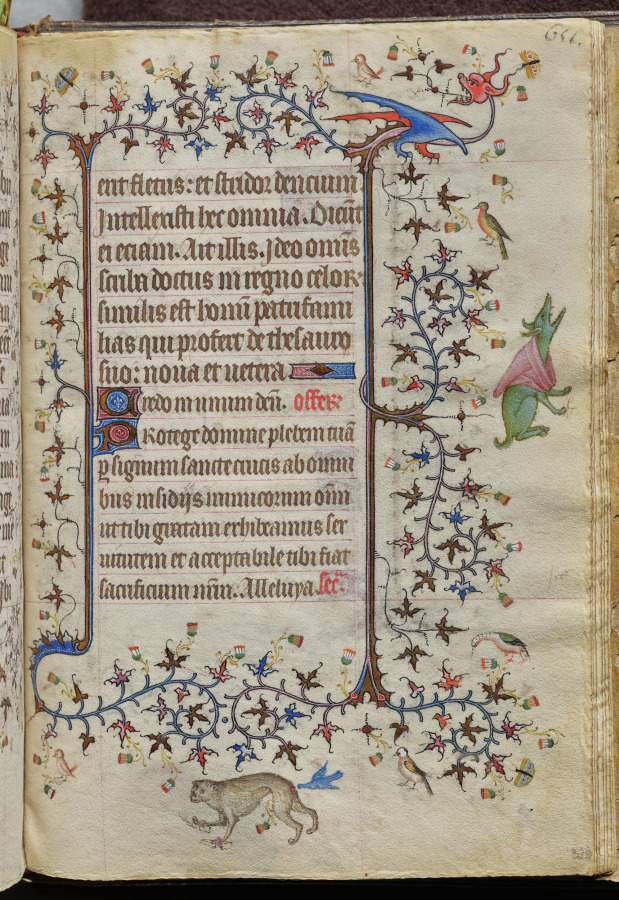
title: Hours of Charles the Noble, King of Navarre (1361-1425), fol. 320r, Text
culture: France, Paris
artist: Master of the Brussels Initials and Associates (French)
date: c. 1405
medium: ink, tempera, and gold on vellum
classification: Bound Volume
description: This precious volume was obviously highly prized by its owner, the French-born King of Navarre, who had his coat of arms painted on no less than twenty folios. Rather than directly commissioning this manuscript from a specific workshop, it seems that Charles the Noble acquired his book of hours -- perhaps ready-made for the luxury market -- while on a trip to Paris in 1404-05. A collaborative effort, six painting styles are evidenced within the pages of this codex, those of two Italians, two Frenchmen, and two Netherlanders. The painter who was responsible for the planning and decoration of the book, and who produced seventeen of the large miniatures, was a Bolognese artist known as the Master of the Brussels Initials. His principal assistant, responsible for most of the borders, was a Florentine who signed his name "Zecho" da Firenze on folio 208 verso.